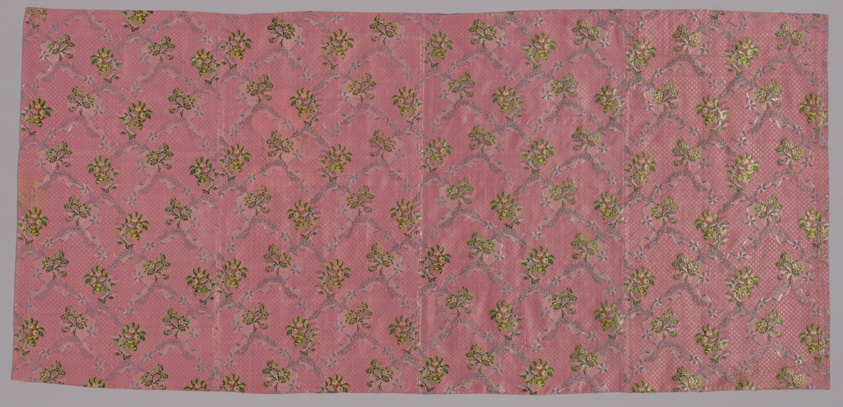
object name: Textile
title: Four Lengths of Woven Silk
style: 18th Century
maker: France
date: 1760s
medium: Silk, plain weave foundation with complementary patterning wefts and supplementary brocading wefts of silk and flat silver metal strips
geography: France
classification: textile; weaving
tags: flowers, floral arrangements, ribbon, botanical/floral, grids, foliage, garlands